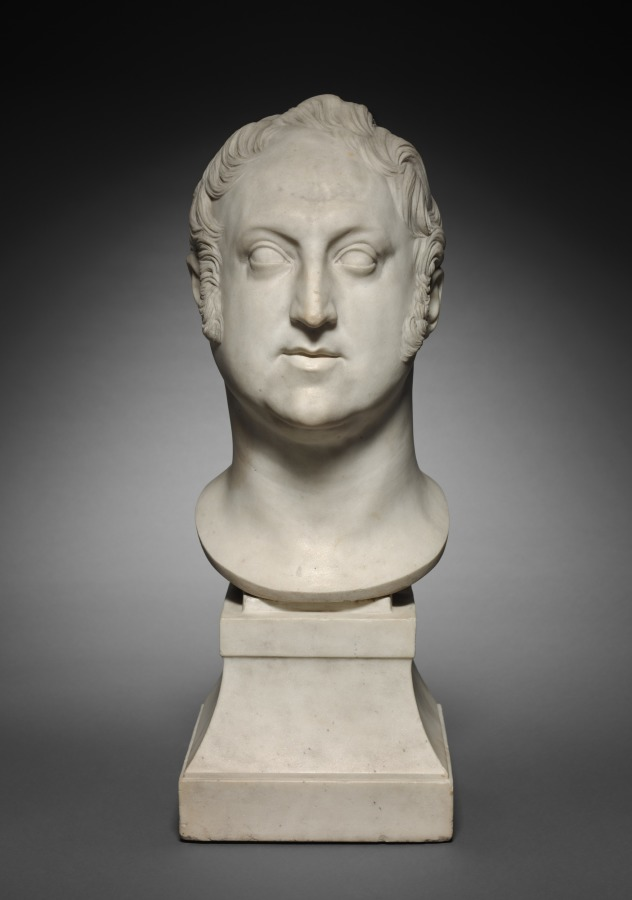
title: Bust of Rossini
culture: France, 19th century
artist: Pierre Jean David d'Angers (French, 1788–1856)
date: 1831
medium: marble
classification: Sculpture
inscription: inscribed at back of neck: A / Joachino Rossini de Pesaro / P.J. David d'Angers / 1831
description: Gioacchino Antonio Rossini (1792–1868) was a composer most famous for his comic operas. Although of Italian birth, much of Rossini's later life was spent in Paris, where he undoubtedly sat for this portrait for David d'Angers, whose ambition it was to sculpt portraits of all the famous people of his day.